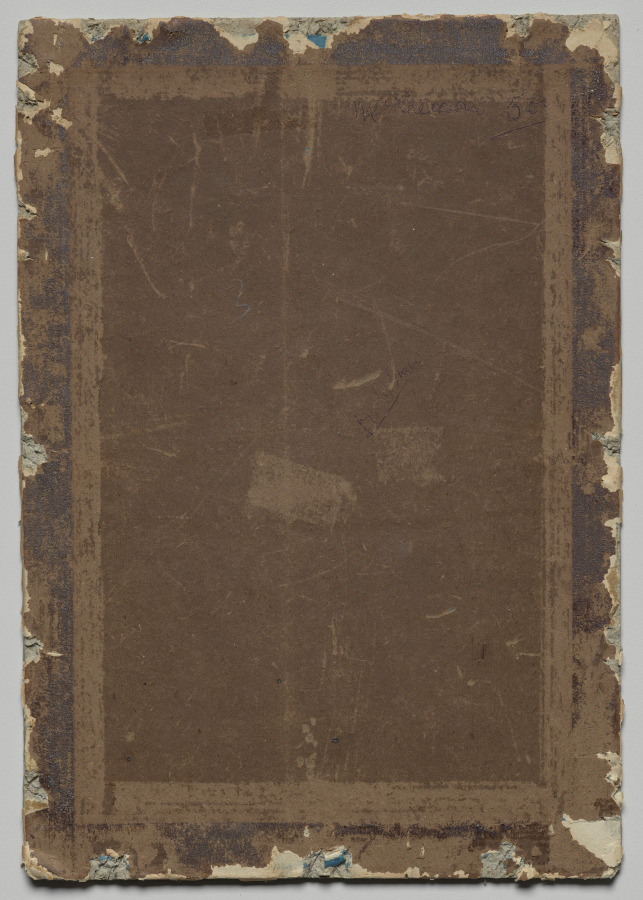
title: Woman with a Letter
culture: France, 18th century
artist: attributed to Sigmond Freudeberg (Swiss, 1745–1801)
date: 1750–1800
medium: Watercolor and gouache with point of brushwork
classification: Drawing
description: An elegantly dressed woman stands at the center of the composition. She carries a plate with a tea cup and saucer in one hand while she holds a letter, marked with a prominent red seal, up to her lips with the other. This drawing captures the woman in mid-action as she tiptoes across the room.